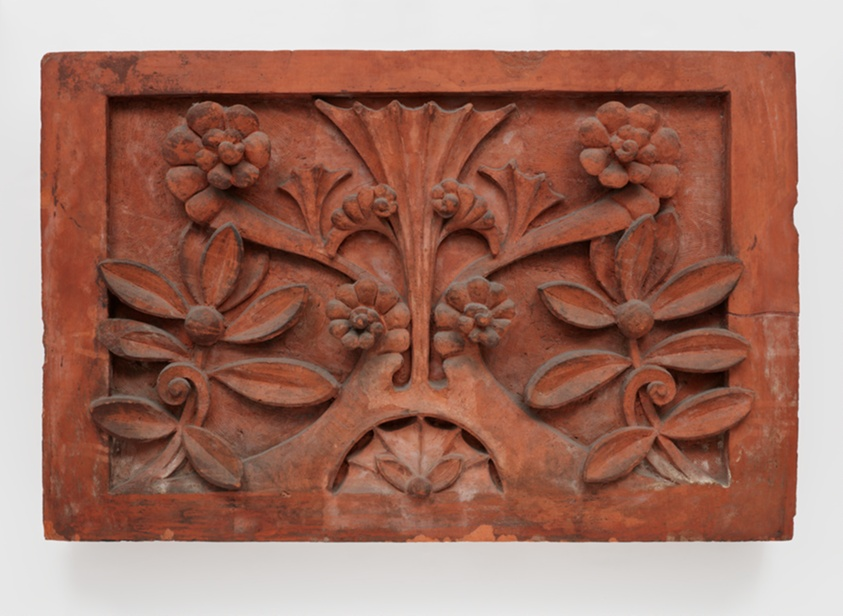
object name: Architectural fragment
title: Spandrel Panel from the Rosenfeld Building, Chicago, Illinois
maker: Adler and Sullivan (American, 1883-1896); Louis Sullivan (American, 1856–1924); Dankmar Adler (American, born Germany, 1844–1900)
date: 1881-82 (demolished 1958)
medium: Terracotta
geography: United States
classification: architectural fragment; architecture